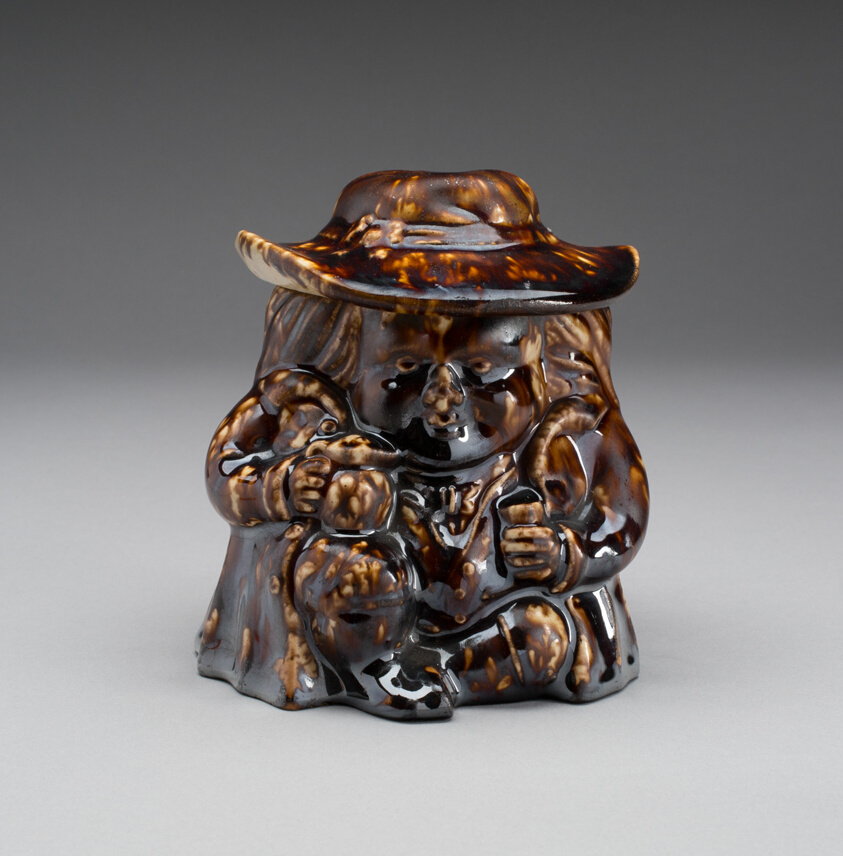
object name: Decorative Arts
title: Snuff Jar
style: Folk Art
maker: Lyman, Fenton & Company; American, 1849–52; Bennington, Vermont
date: 1849–52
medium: Earthenware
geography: Bennington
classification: vessel; earthenware; american decorative arts; american arts; ceramics; decorative arts